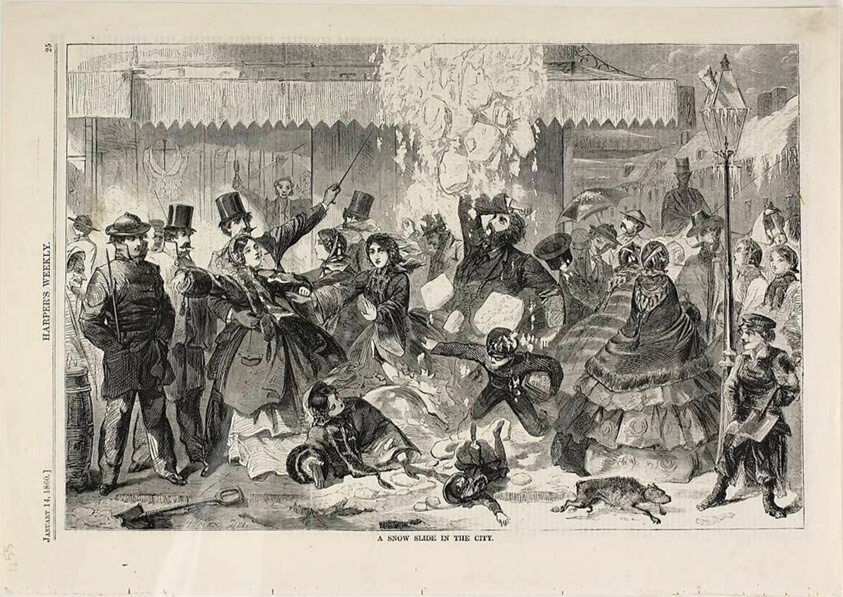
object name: Print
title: A Snow Slide in the City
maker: Winslow Homer (American, 1836-1910); published by Harper's Weekly (American, 1857-1916)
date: published January 14, 1860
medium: Wood engraving on paper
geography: United States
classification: wood engraving; print; prints and drawing